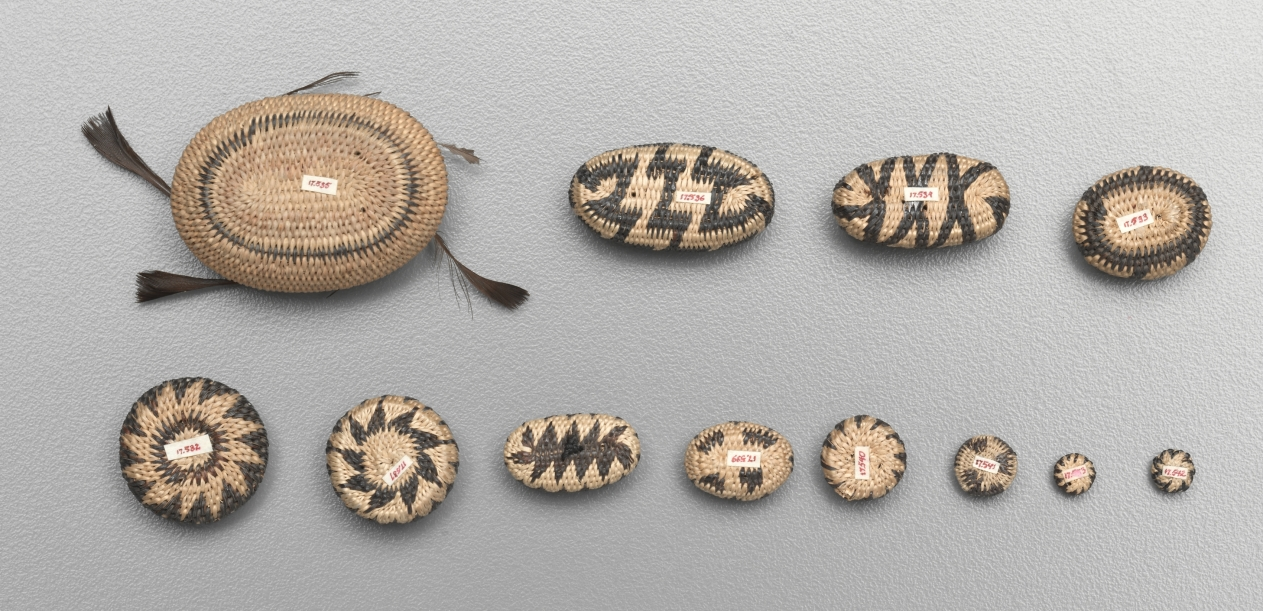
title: Miniature Round Basket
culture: California, Pomo, late 19th-early 20th century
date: late 1800s-early 1900s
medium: plant materials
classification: Basketry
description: Miniature baskets were made to demonstrate the basket-maker’s virtuoso skill, and these tiny marvels seem to be no exception—the smallest are only five millimeters wide but still patterned. For such fine work, dexterity was required as much for preparation of materials as for weaving.